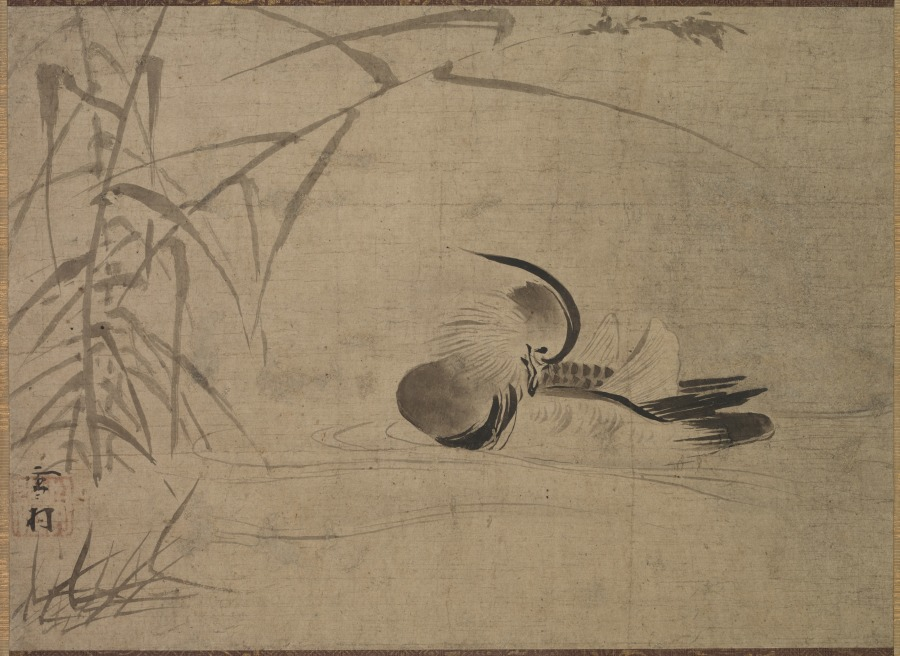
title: Mandarin Duck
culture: Japan, Muromachi period (1392–1573)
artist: Sesson Shūkei (Japanese, c. 1492–c. 1577)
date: 1500s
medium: hanging scroll; ink on paper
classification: Painting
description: In this painting, the artist depicted a scene of a solitary duck floating by reeds in a subtle arrangement of dry and wet, light and dark ink tones which conveys the tranquility of the moment.